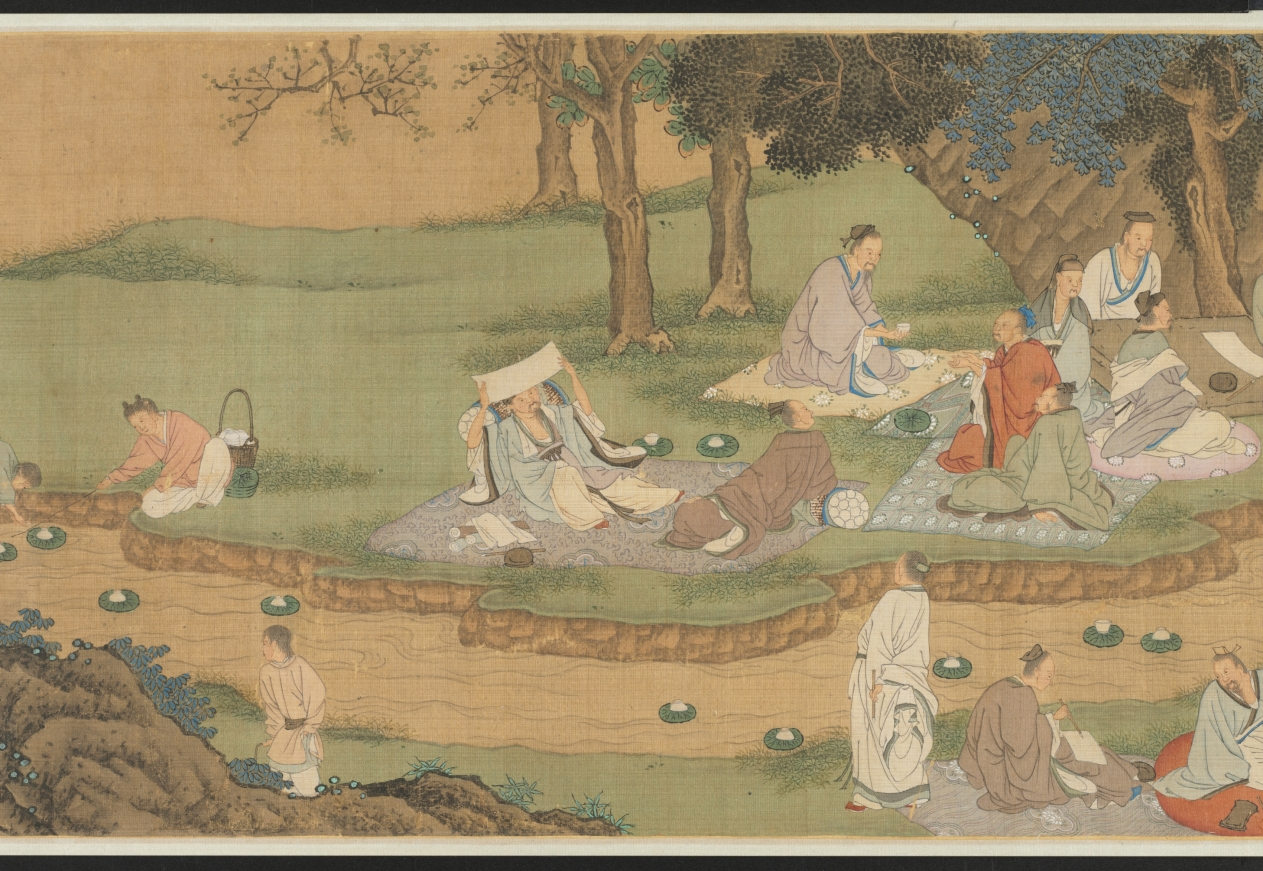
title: Purification at the Orchid Pavilion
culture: China, Qing dynasty (1644-1911)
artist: Fan Yi (Chinese, c. 1615–before 1688)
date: 1671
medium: Handscroll; ink and color on silk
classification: Painting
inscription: Artist's inscription, signature, and 2 seals: Painted by Fan Yi of Zhongfu during the second month of winter of the xinhai year [1671]. [2 seals] Fan Yi zhi yin, Zi yu yi.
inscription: Title on the frontispiece by Monk Yueshan (1629-1709).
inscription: 3 colophons and 13 additional seals: 1 colophon, dated 1707, and 6 seals of Yueshan; 2 colophons and 3 seals of Wong Kwan-Shut (Huang Junshi) 黃君實 (b. 1934); 2 seals of Fu Shen 傅 申 (b. 1937); 2 seals of Tessai Tomioka 富岡鐵齋 (1836-1924).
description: By the 1600s, the historic gathering at Lanting, Zhejiang province, in 353 CE was a common theme in Chinese painting. Originally based on a composition attributed to Li Gonglin (1049– 1106), now lost, Wu school artists revived the theme. Fan Yi, the brother of the artist Fan Qi from Nanjing, used delicate brushwork and luminous colors to depict the spring gathering.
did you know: The gathering’s host is in the Orchid Pavilion at the end of the scroll, representing an episode known as “Wang Xizhi Watching the Geese 王羲之觀鵝圖.”